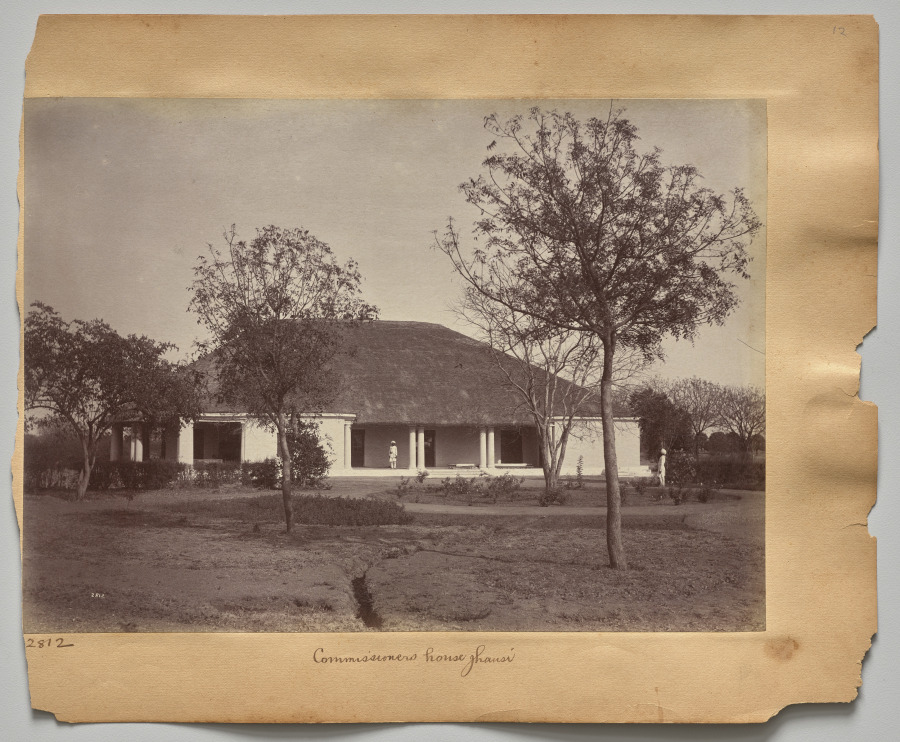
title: Commissioner's house, Jhansi (recto)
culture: India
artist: Raja Deen Dayal (Indian, 1844–1905)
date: c. 1882–87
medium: albumen print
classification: Photograph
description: These photographs are part of an album, now disassembled, of around 105 photographs taken in India between 1885 and summer 1887 that provide glimpses into the lives of the British colonial elite and royal and upper-class Indians. The museum holds another group of 37 pictures from this album (2016.266), which was probably commissioned by a British civil servant visiting or working in India around 1888 as a personal souvenir of his experiences there.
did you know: Raja Deen Dayal is regarded now, and was considered during his lifetime, to be India’s most important 19th-century photographer.